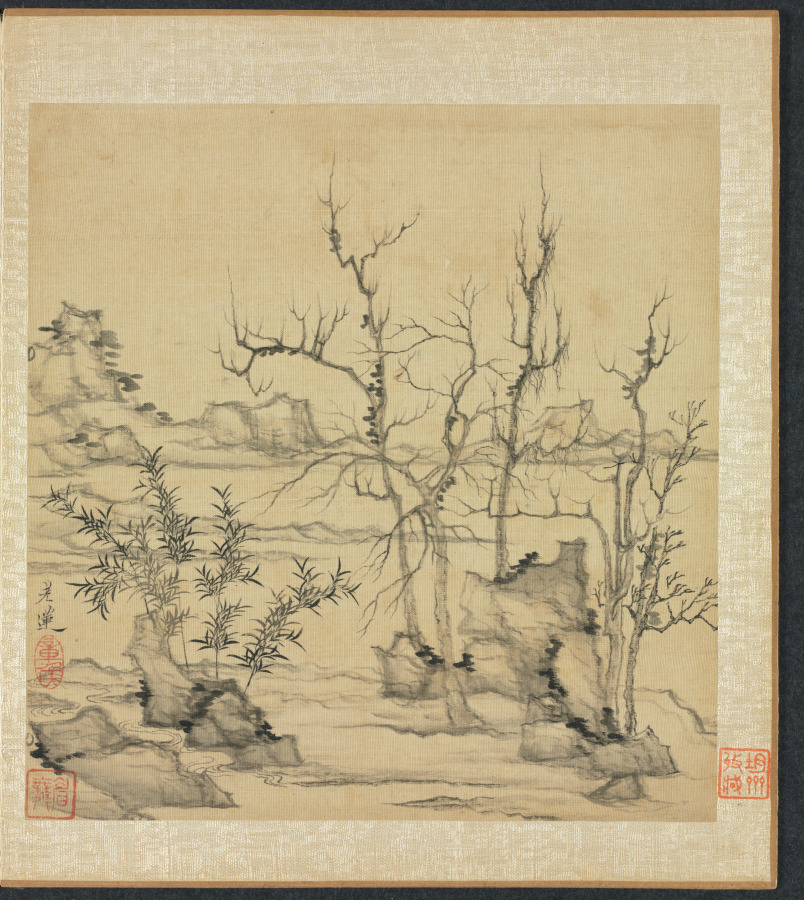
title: Paintings after Ancient Masters: Landscape in the Style of Ni Zan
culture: China, Ming dynasty (1368–1644)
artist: Chen Hongshou (Chinese, 1598/99–1652)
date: 1598–1652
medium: album leaf, ink and color on silk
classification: Painting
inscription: Lao-lien [Seal] Chang-hou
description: The twenty paintings in this double-album by Chen Hongshou include landscapes, figures, and flowers. It also has one leaf featuring a woman, an often-used subject not found in the other albums from the latter part of his career. His late works are wonderful summations of Chen's peculiar and quirky art--archaistic, hyper-refined--but without accompanying shallowness or sentimentality. His figures and landscapes in the late albums are miniaturized, not unlike the small Chinese gardens, or the carefully selected small table rocks or old roots used for contemplation to see the world in miniature. This loss of scale is quite deliberate and reflects the psychological situation of a depressed class like the Ming loyalist officials and scholars, deprived of their integrity and honor, and forced to lead a diminished and restricted existence.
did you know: Ni Zan (1301–1374) was known for his sparse, monochromatic ink landscape paintings.